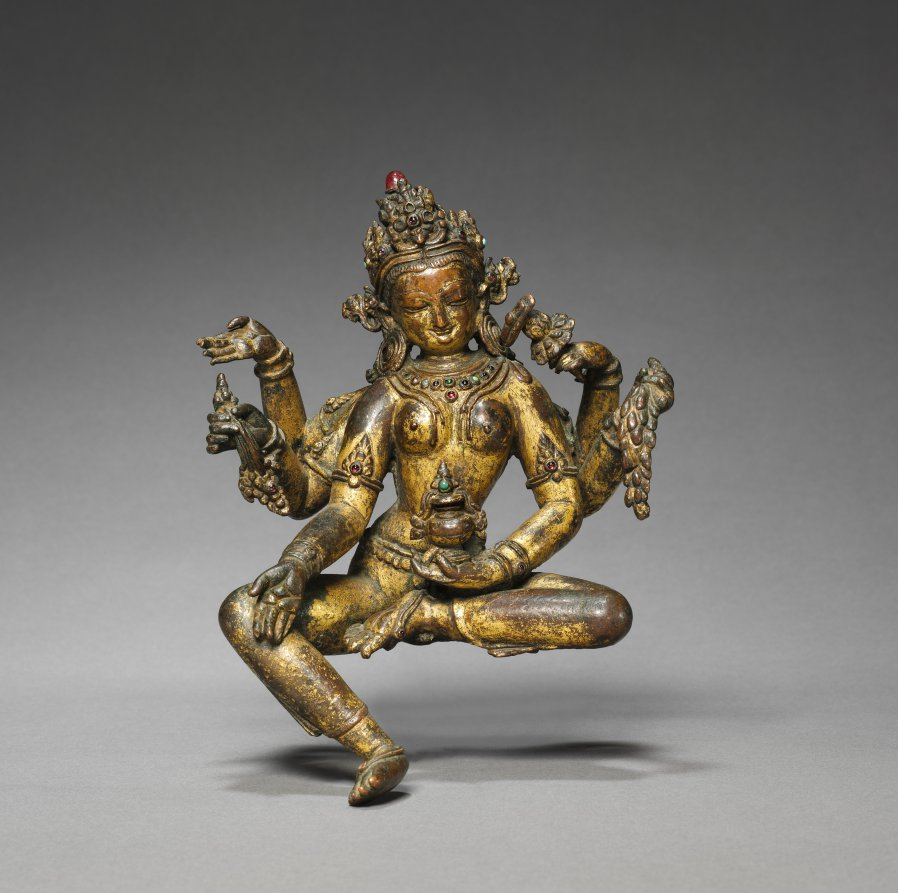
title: Vasudhara, Goddess of Abundance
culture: Nepal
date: 1300s–1400s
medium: gilt bronze and semiprecious stones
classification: Sculpture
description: In Nepal this female counterpart of the god of wealth is one of the most popular divinities. This image was set up in either a domestic shrine or a Buddhist monastery, where devotees would pray to her for wealth, prosperity, and children. In each of her six arms she holds objects pertaining to life and abundance: jewels, an overflowing pot, and a sheaf of wheat. A Buddhist philosophical text rests on top of the lotus flower she holds in her topmost left hand, suggesting that wealth and prosperity can derive from the acquisition of true knowledge.